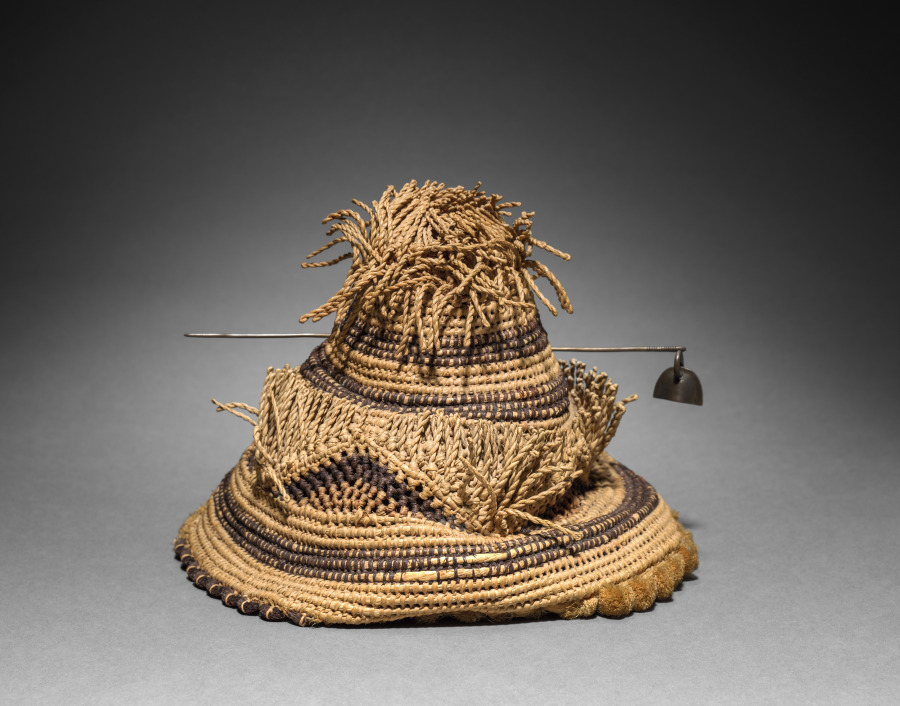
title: Hat (laket mishiing) with Pin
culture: Africa, Central Africa, Democratic Republic of Congo, early 20th century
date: early 1900s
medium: Raffia, metal, and dye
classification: Garment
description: Titled Kuba men and prominent women wear the laket, a small ornate dome-shaped hat. An essential fashion item of adult men in good social standing, it focuses special attention on the head as a significant marker of individual identity, ethnic affiliation, status, and role in society. This prestige object is secured on the crown of the head with a nine-and-a-half-inch metal pin that pierces through the hat onto a clump of hair. The laket is made from raffia palm fiber coiled into threads and woven in two alternating patterns and contrasting light and dark (dyed) wefts. There are two examples of the laket: the plain type with the flat top, and the more elaborate type called the laket mishiing.